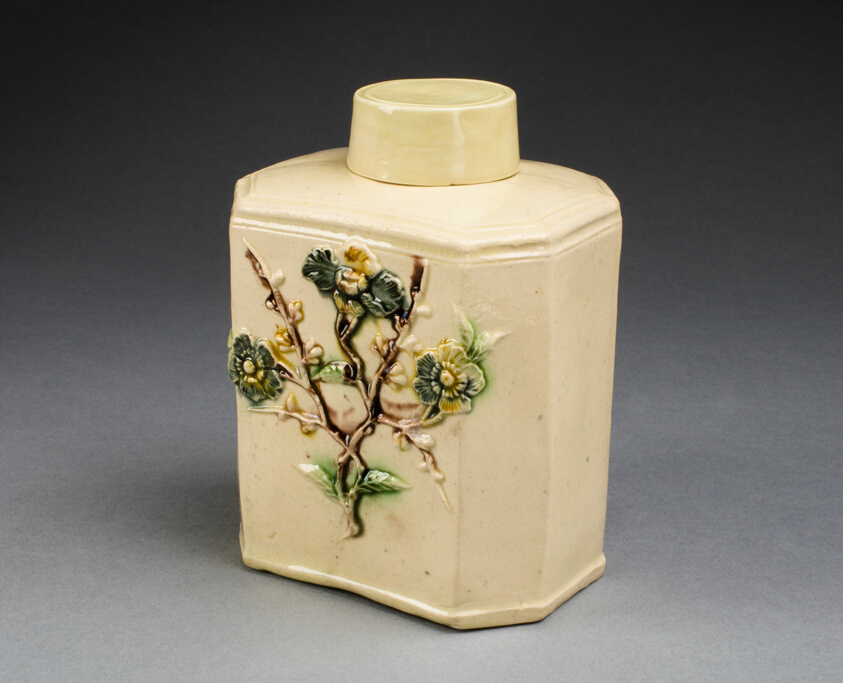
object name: Ceramics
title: Tea Canister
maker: Staffordshire, England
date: c. 1770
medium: Lead-glazed earthenware (creamware)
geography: Staffordshire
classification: teaware; container; creamware; ceramics; earthenware; european decorative arts; lead-glazed earthenware